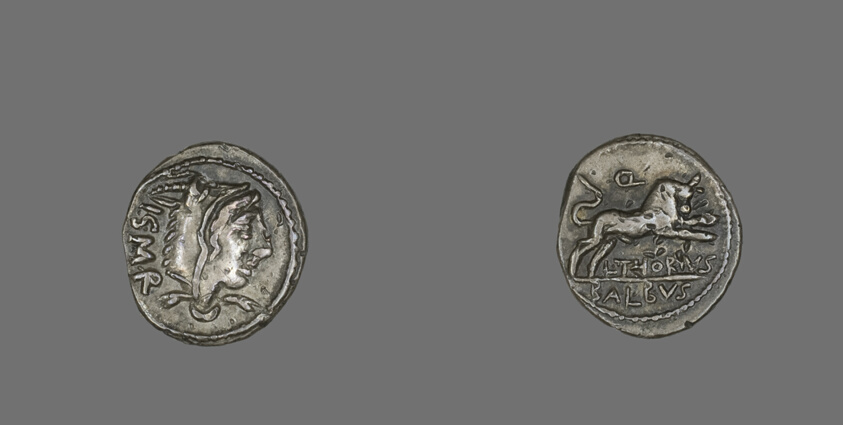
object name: Coin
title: Denarius (Coin) Depicting the Goddess Juno Sospita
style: republic period, ancient, roman (ancient, style or period)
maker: Roman, minted in Rome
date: 105 BCE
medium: Silver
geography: Italy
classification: coin; ancient art; struck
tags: goddesses, bull